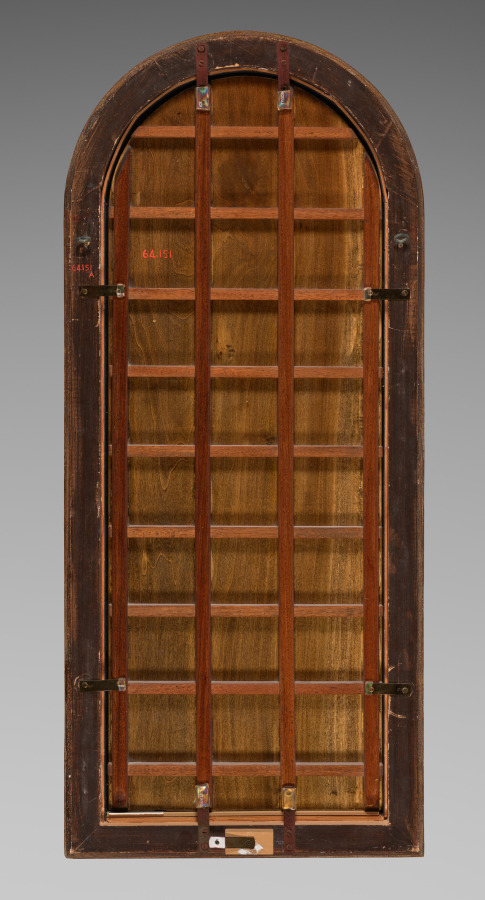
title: Panel from a Triptych: St. Anthony Abbot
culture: Italy, 15th century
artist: Fra Filippo Lippi (Italian, c. 1406–1469)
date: 1458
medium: tempera on wood panel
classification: Painting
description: These panels depicting Saints Anthony the Abbot and Michael originally flanked a central scene of the Madonna and Child with Angels, now lost, to form a triptych. Giovanni di Cosimo de’Medici of Florence commissioned the ensemble in 1457 as a gift to Alfonso V of Aragon. Fra Filippo Lippi, a Carmelite friar and one of the great masters of early Renaissance Florence, depicted realistic, weighty figures in a three-dimensional space using a system of linear perspective, inspired partly by Masaccio’s Brancacci Chapel, and reflected in the background architecture. Saint Anthony the Abbot rejected all earthly possessions in pursuit of a contemplative life in the desert. He is generally regarded as the founder of monasticism and is depicted wearing a monk’s habit. Saint Michael’s sword and shield refer to his role as heaven’s defender against evil.